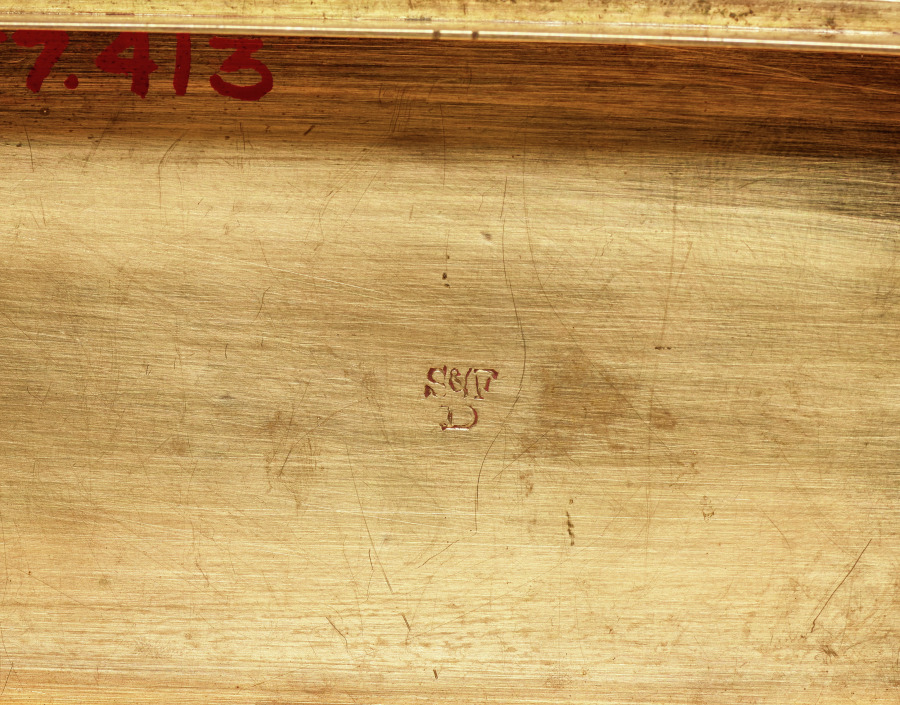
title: Box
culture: Switzerland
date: early 1800s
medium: gold and enamel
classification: Miscellaneous